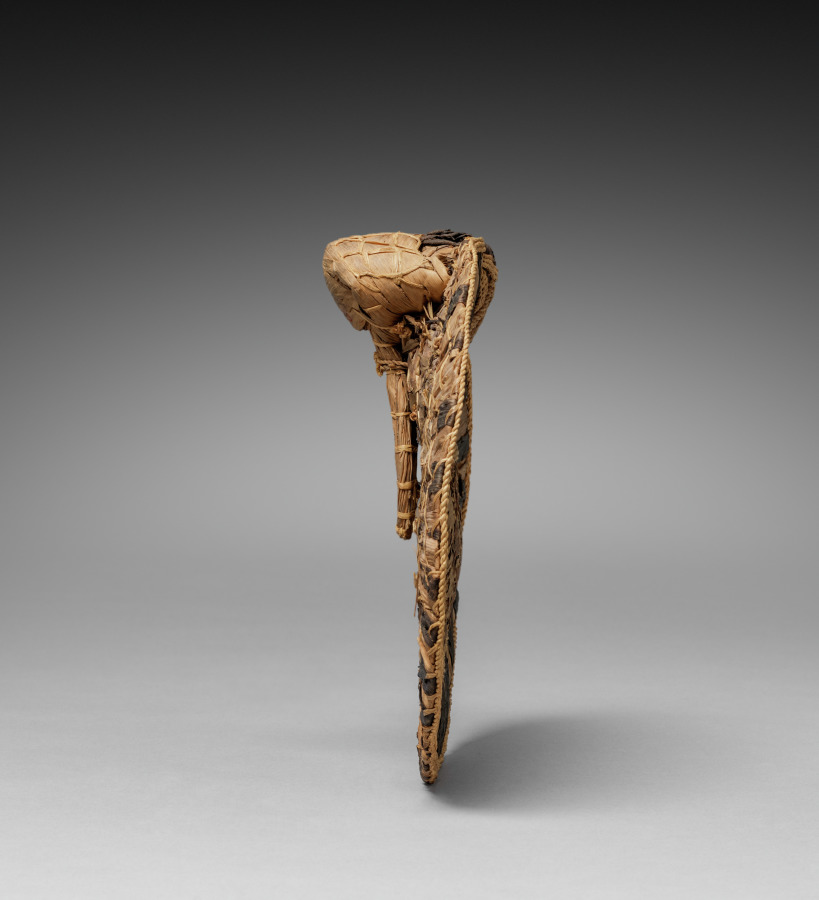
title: Back Skirt/Sitting Pad (negbe)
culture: Africa, Central Africa, Democratic Republic of Congo, Mangbetu-style makers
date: by 1928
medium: Plant fibers and dye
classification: Garment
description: Egbe (singular: negbe) were fashionable and practical garments aristocratic Mangbetu women made for special occasions. Worn over a skirt, it tied onto a girdle along with a frontal “apron.” The curved interior piece rested on the lower back. Thickly woven, flexible natural fibers bent with the body, cushioning the wearer’s behind when sitting. When the woman was standing, the decorated flat portion faced outward, showing off bold geometric motifs. Egbe were among items sold to foreigners at the Mangbetu king’s encouragement as the Mangbetu actively constructed their self image for outsiders during the 1920s and 1930s.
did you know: A curved "handle" on the negbe's interior allowed it to rest on the tailbone.